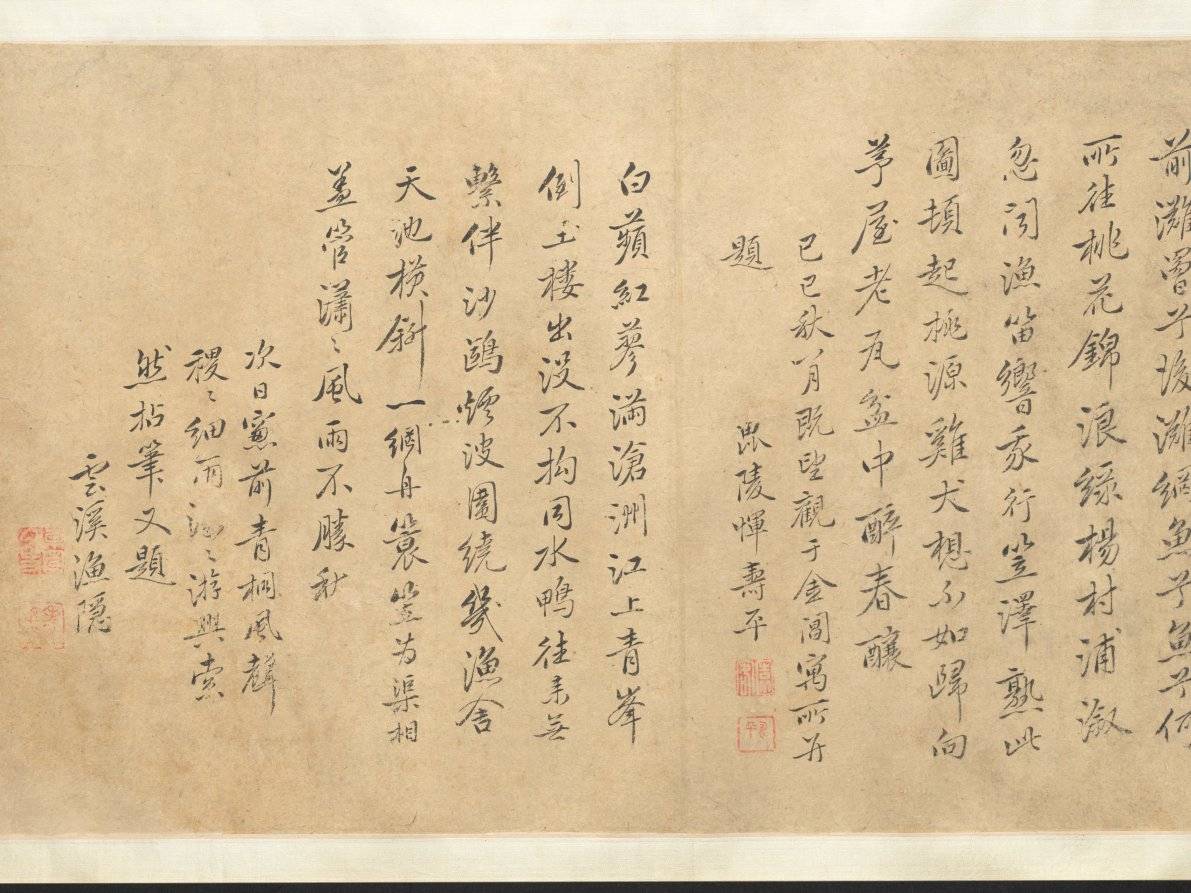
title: Fisherman's Joy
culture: China, Ming dynasty (1368–1644)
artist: Qian Gu (Chinese, 1508–c. 1578)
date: 1572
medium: Handscroll; ink and light color on paper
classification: Painting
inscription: Artist's inscription, signature, and seal: On the autumn day of the jen-shen year [1572], P'eng-ch'eng, Ch'ien Ku painted [this]. [seal] Hsüan-ch'ing shih. 2 colophons, both dated 1689, and 5 additional seals of Yün Shou-p'ing (1633-1690).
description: This painting has a scene showing two small crafts, each manned by two fishermen, practicing a traditional fishing method. In one of them, a man uses a bamboo pole to direct the movements of a cormorant bird sent into the water. Cormorant fishing, witnessed in some areas of the lower Yangzi River, appears in Zhe school paintings. Qian Gu may have borrowed these narrative figure scenes from Zhe school paintings, while his vantage point, brushwork, and soft tones align with the Wu school style. Scenes of fishermen appealed to urban and educated audiences who idealized the self-sufficient independence of fisherfolk.